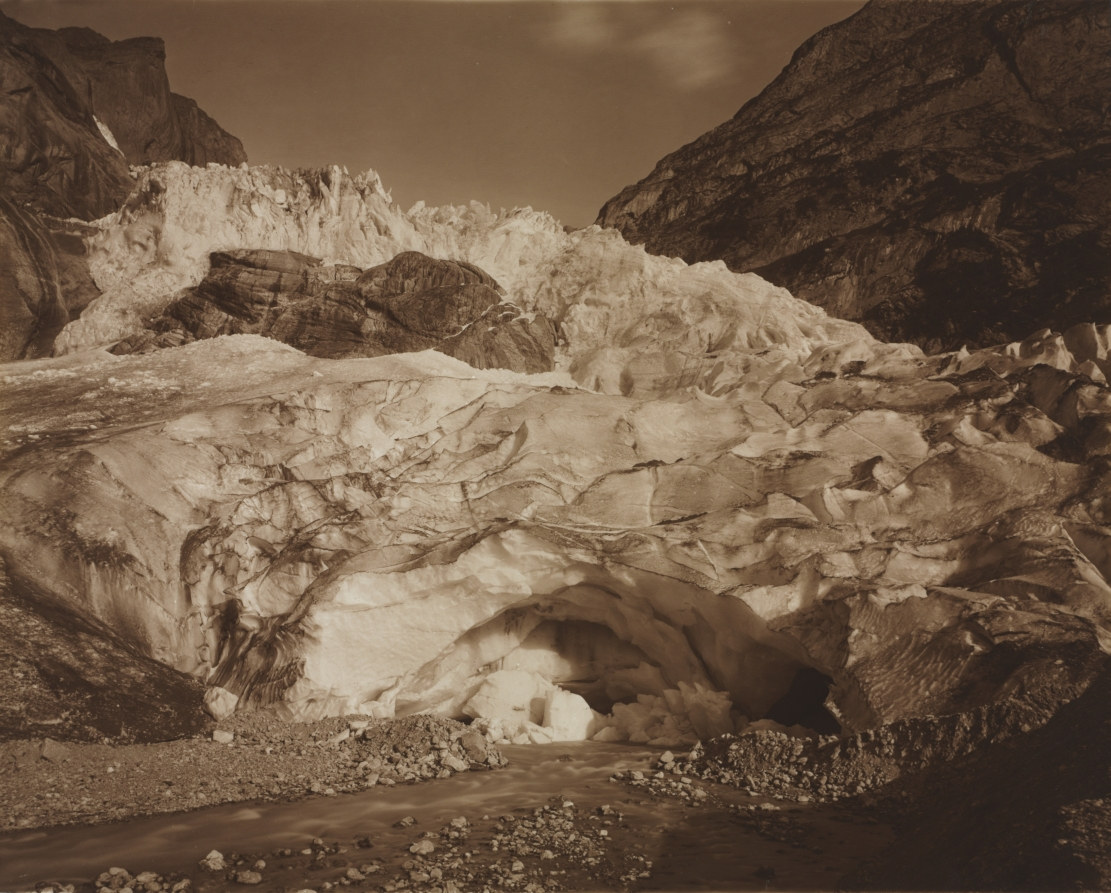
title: Switzerland. Grindelwald, Upper Glacier, Source of the Lutschine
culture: France, 19th century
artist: Adolphe Braun (French, 1812–1877)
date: 1875–77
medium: Carbon print, toned, from wet collodion negative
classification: Photograph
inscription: Written in pencil on verso: "3/8"; "318"; "D [?]"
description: Braun's photographs often bore a stylistic resemblance to realist painting in France. Photography was an important factor in the evolution of realism, a style that was then gaining popularity. With its forthright depiction of natural forces, this photograph of a river springing from a glacier clearly recalls landscape paintings by Gustave Courbet (1819–1877). Courbet's numerous river scenes were contemporary with Braun's work and were part of the aesthetic context of the time.